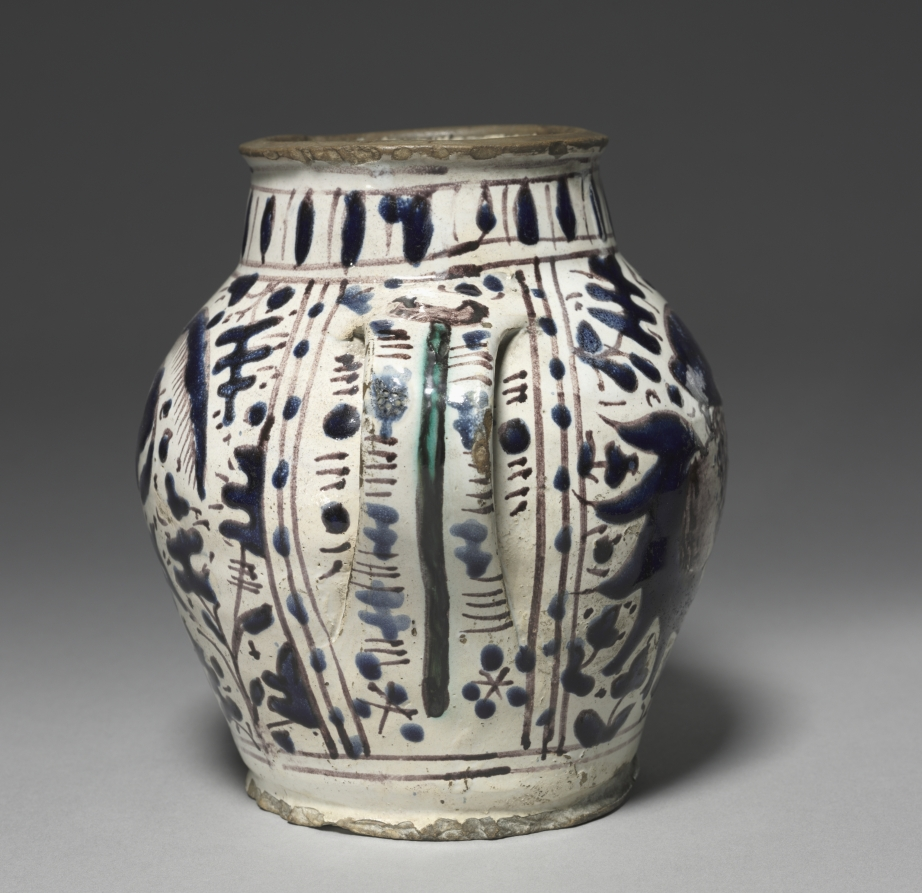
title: Two-Handled "Oak Leaf" Drug Jar with Male and Female Portraits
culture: Italy, Florence, 15th century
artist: workshop of Giunta di Tugio (Italian, c. 1382–1450)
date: 1431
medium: tin-glazed earthenware (maiolica)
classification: Ceramic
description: This two-handled drug container with a bulbous body and short neck belongs to a group of wares known as "oak leaf jars" because of their decoration. This example includes two profile busts amid blue-on-white oak leaves on branching stems. On each handle is a crutch, painted in green and manganese. This was the badge of the Hospital of Santa Maria Nuova in Florence. The star motif below the crutch is the workshop mark of the ceramist Giunta di Tugio, known to have received this commission in the year 1431. In the early Middle Ages hospitals were simple hospices set up outside cities to offer food and lodging to pilgrims and travelers. The Santa Maria Nuova hospital, by the mid-1300s the largest in Florence, was the first hospital in that city dedicated primarily to caring for the sick.